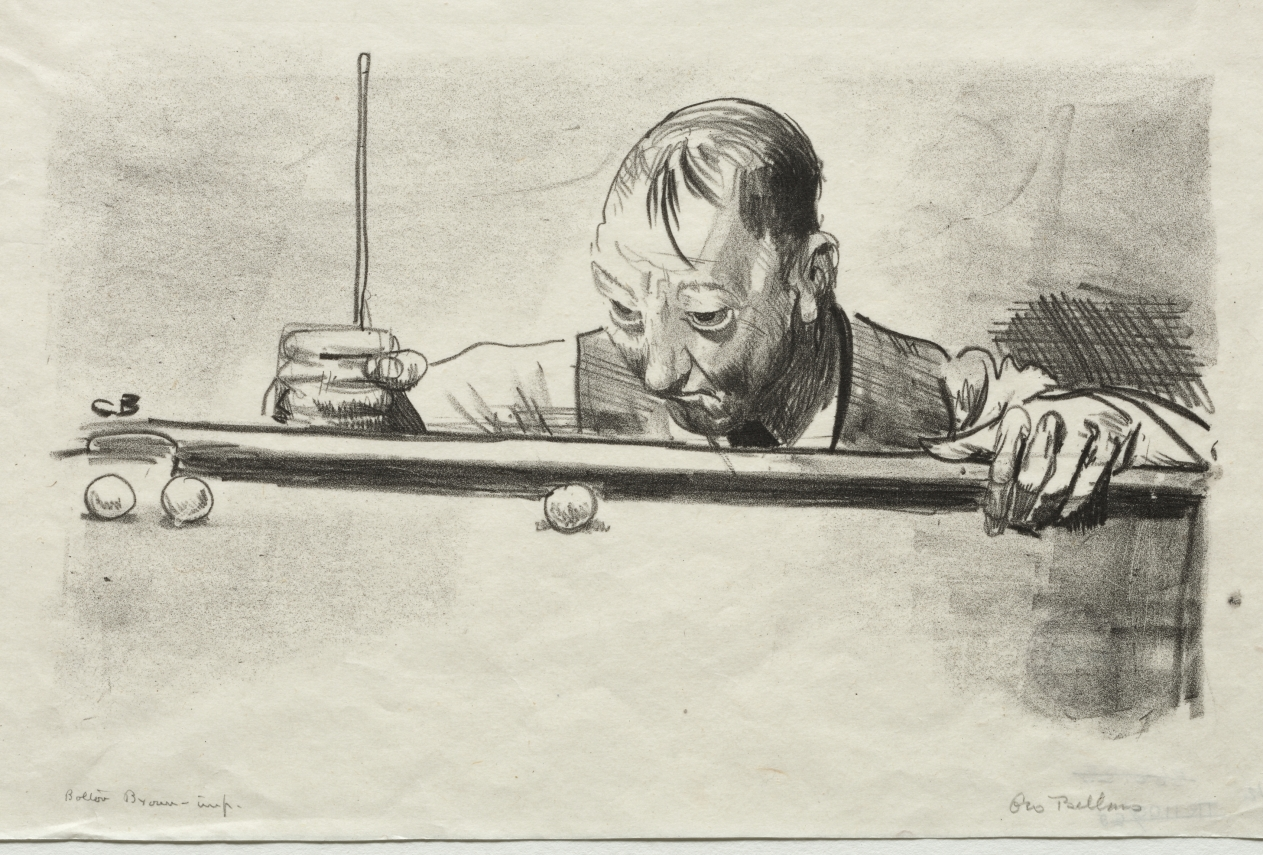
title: Indoor Athlete, Second Stone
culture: America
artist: George Bellows (American, 1882–1925)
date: 1921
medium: lithograph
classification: Print